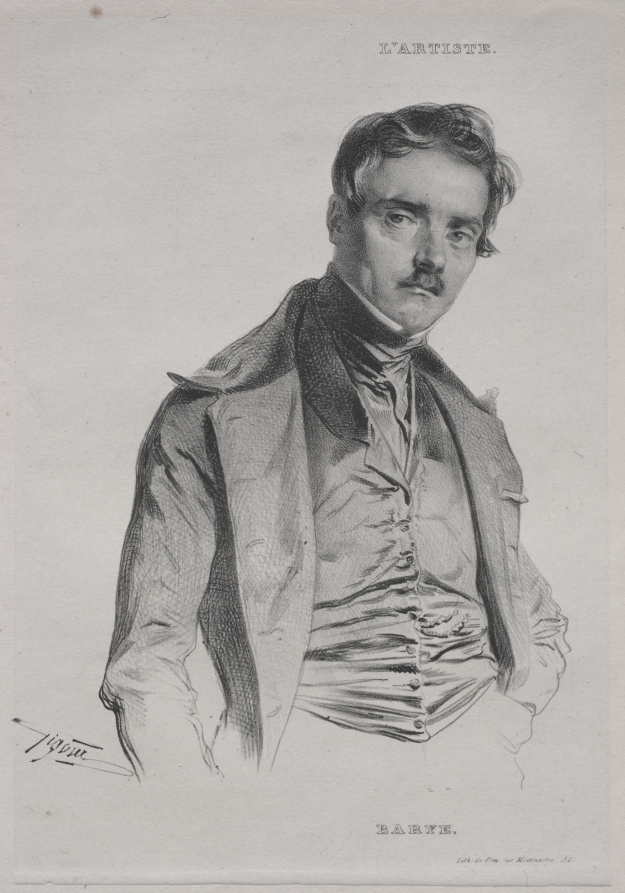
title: Antoine-Louis Barye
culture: France, 19th century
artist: Jean Francois Gigoux (French, 1806–1894)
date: c. 1840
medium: lithograph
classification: Print